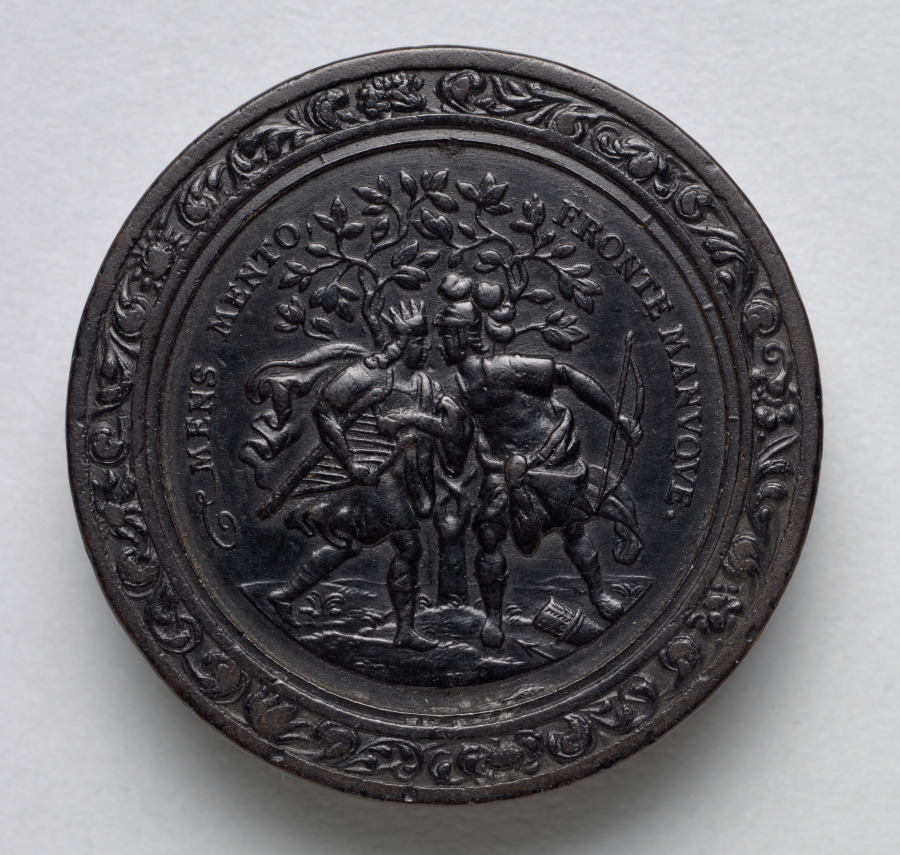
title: Gaming Piece (obverse)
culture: Germany, late 17th-early 18th Century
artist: Martin Brunner (German, 1659–1725)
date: c.1700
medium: wood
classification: Furniture and woodwork